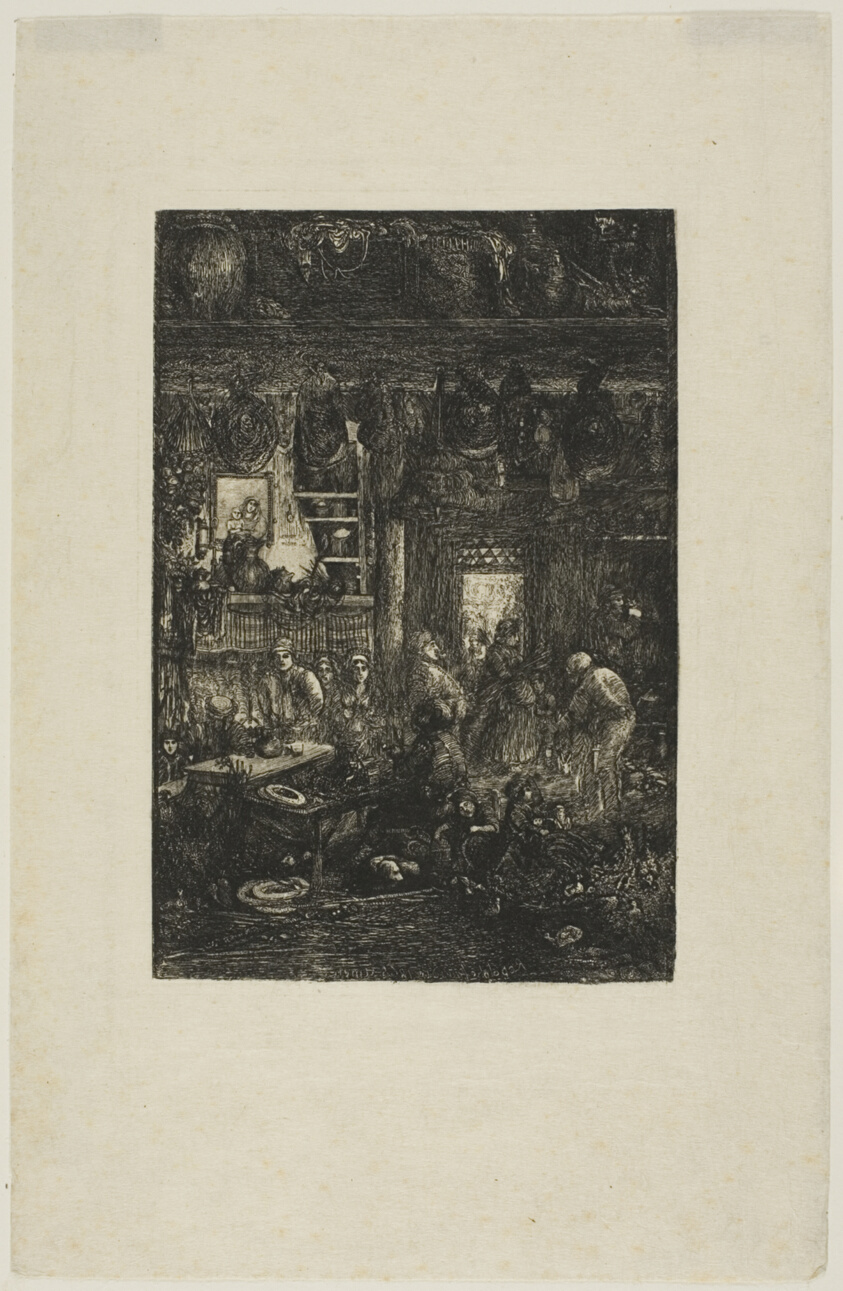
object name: Print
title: Moldavian Interior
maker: Rodolphe Bresdin (French, 1825-1885)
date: 1859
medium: Etching on ivory Japanese paper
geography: France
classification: etching; print; prints and drawing